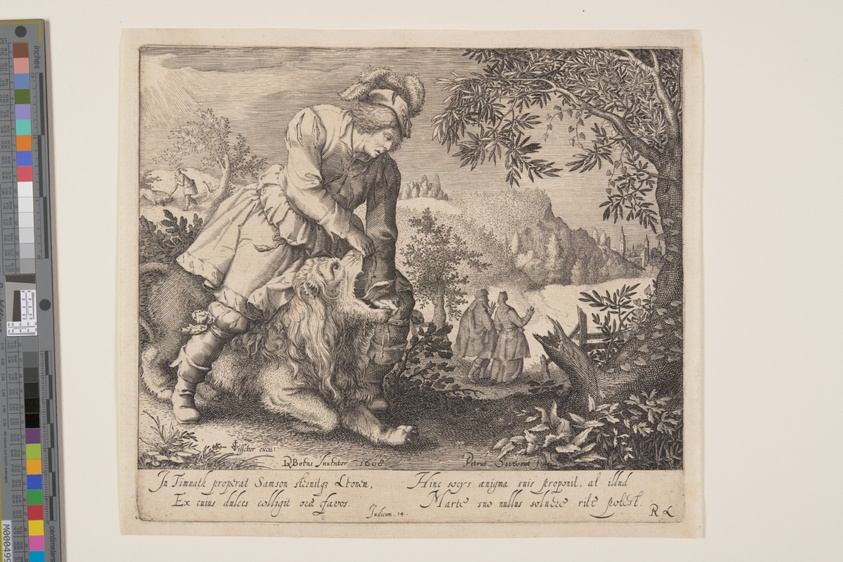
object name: Print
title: Samson and the Lion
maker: Pieter Serwouters (Flemish, 1586–1657); after David Vinckboons (Flemish, 1576-1632)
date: 1609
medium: Engraving on ivory laid paper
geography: Flanders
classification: print; paper; prints and drawing; engraving